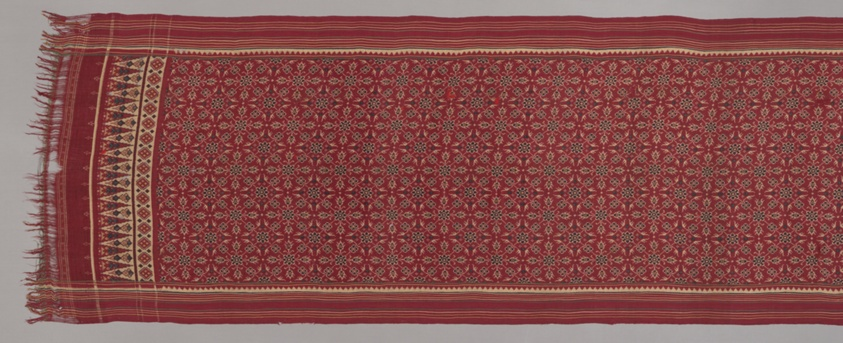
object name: Textile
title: Patolu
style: indonesian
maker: Gujarat, India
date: 18th/19th century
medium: Silk and silver-metal-strip-wrapped silk, stripes of warp and weft resist dyed (double ikat), plain weave, stripes of weft resist dyed (weft ikat), plain weave , bands of plain weave and bands of open warps; plied and knotted main warp fringe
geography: India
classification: textile; weaving - printed